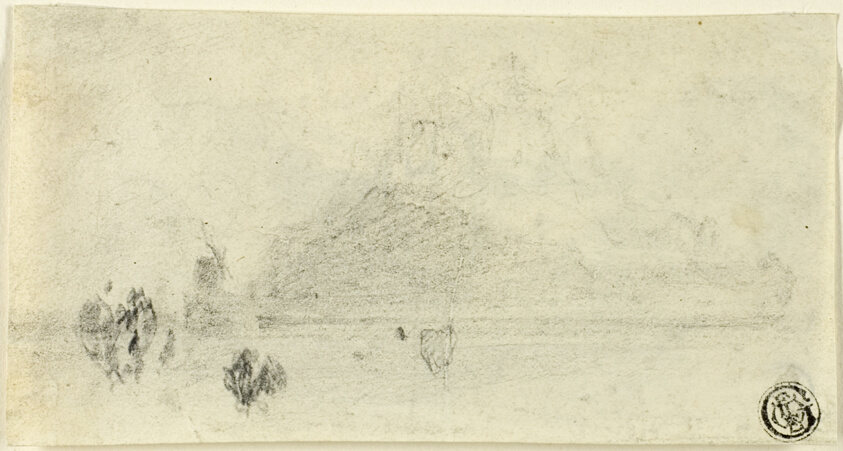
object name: Drawing and Watercolor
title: Sketch of Mont Saint Michel (recto); Buildings Beside Water (verso)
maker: John Sell Cotman (English, 1782-1842)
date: c. 1818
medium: Graphite (recto and verso) on ivory wove paper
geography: England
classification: graphite; drawings (visual works); prints and drawing